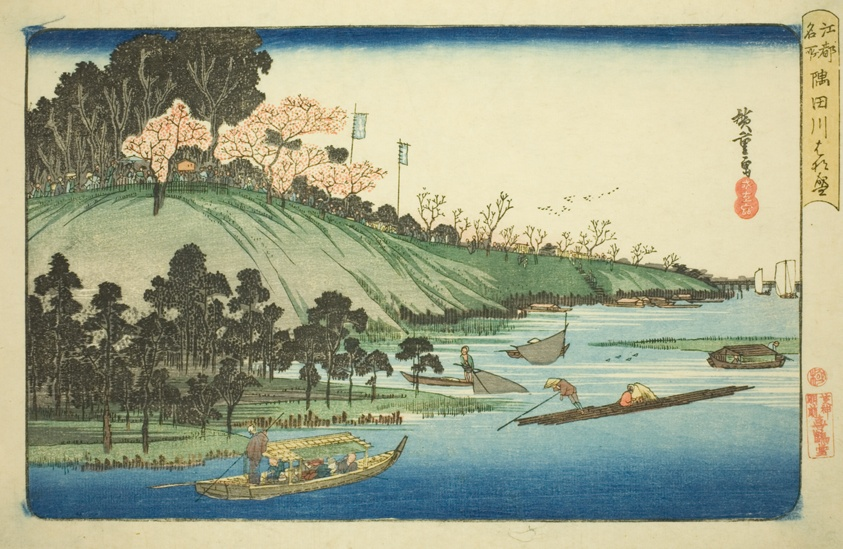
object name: Print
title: Cherry Blossoms in Full Bloom along the Sumida River (Sumidagawa hanazakari), from the series "Famous Places in Edo (Koto meisho)"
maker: Utagawa Hiroshige 歌川 広重; Japanese, 1797-1858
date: c. 1832/34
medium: Color woodblock print; oban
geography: Japan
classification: woodblock print; print; asian art